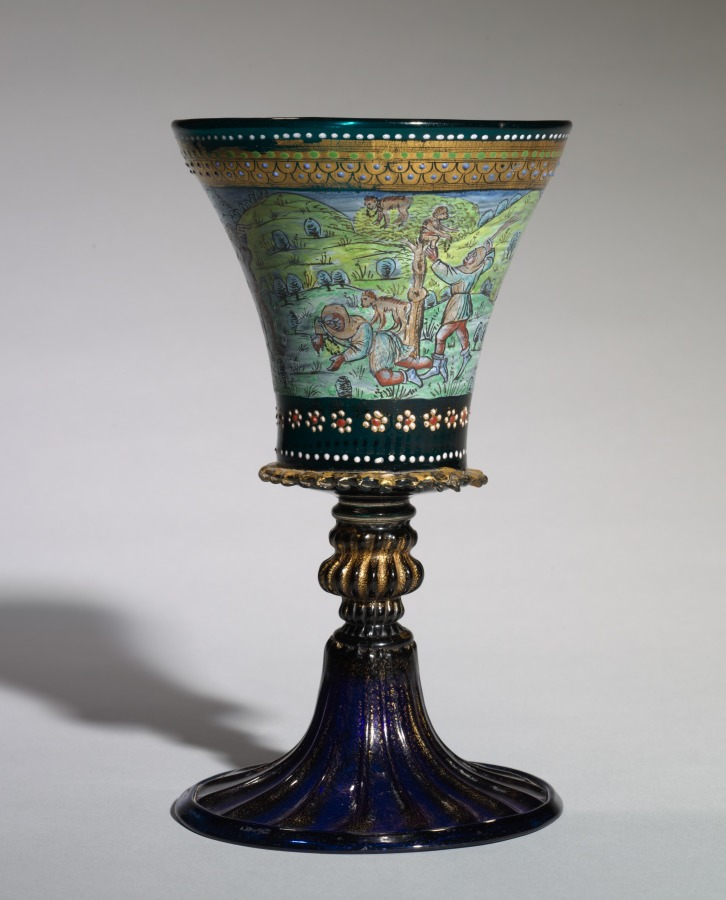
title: The Peddler Goblet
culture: Italy, Venice (Murano), 19th century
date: 1800s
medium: green and blue glass, enameled and gilded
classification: Glass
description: In the decoration of this goblet, the peddler, fast asleep under a tree, is robbed by monkeys. The same subject appears on the famous "Monkey Cup" in The Cloisters of The Metropolitan Museum of Art. It was obviously appealing because peddlers were traditionally believed to have many of the same vices as monkeys. Another part of the decoration includes a scene of Venus emerging from the sea, and the Three Graces.